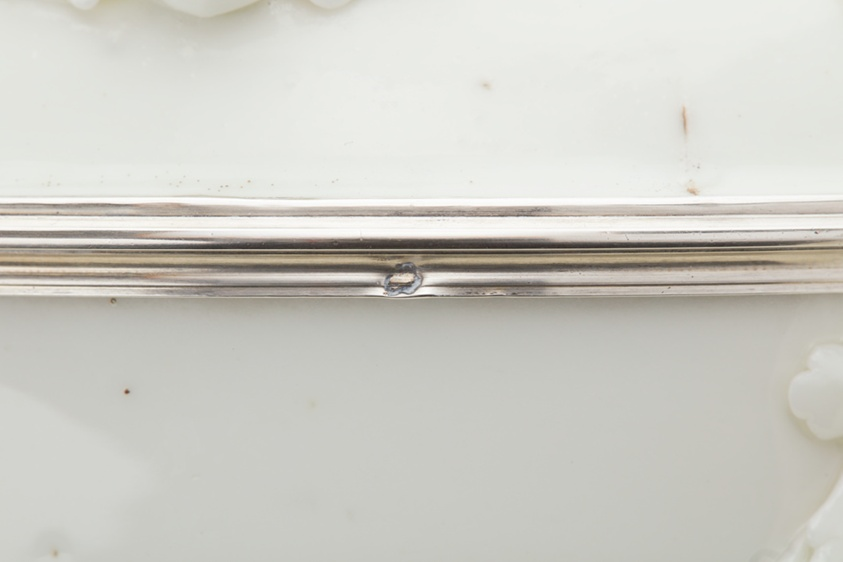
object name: Ceramics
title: Covered Bowl and Stand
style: Neoclassicism, 18th Century, Classical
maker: Mennecy Factory (France, 1750-73)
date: c. 1750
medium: Soft-paste porcelain and silver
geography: Mennecy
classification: mennecy; blanc de Chine; european decorative arts; porcelain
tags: sugar, sugar bowl, tea, tea service